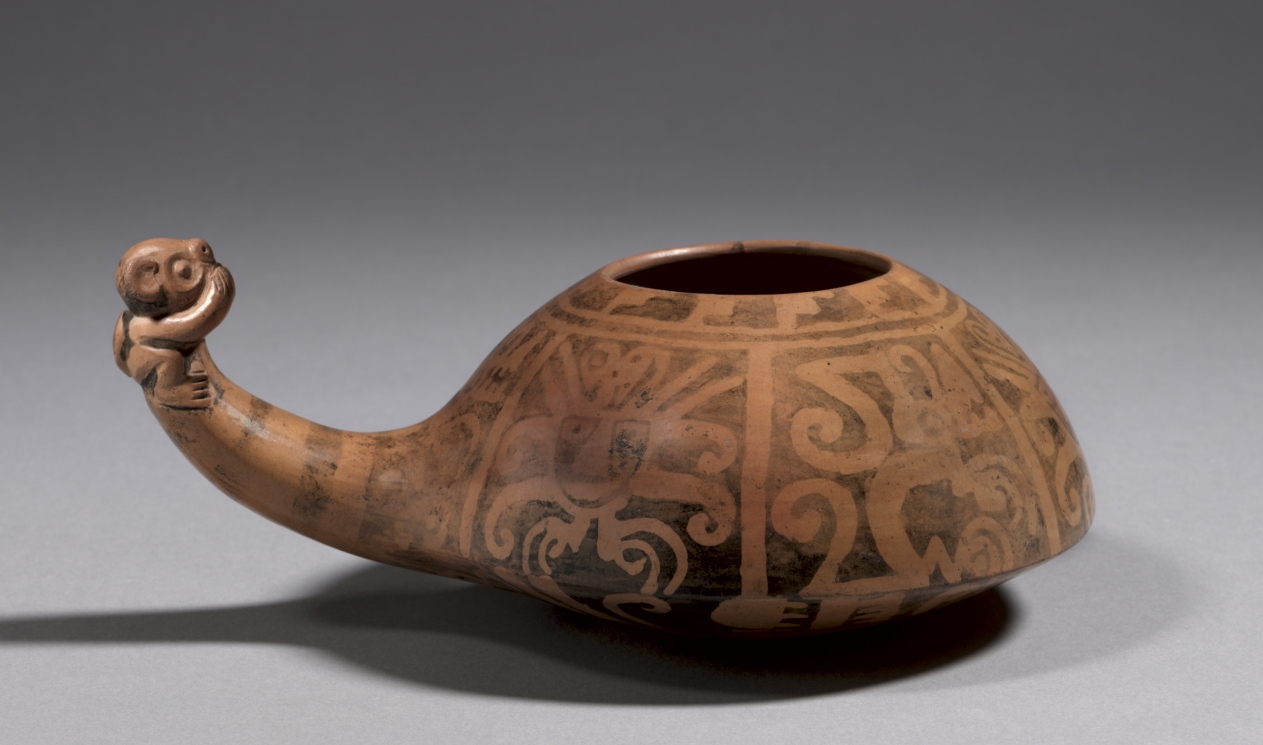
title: Dipper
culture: Peru, North Highlands, Recuay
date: 100 BCE–700 CE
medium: ceramic, slip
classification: Ceramic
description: Both of these objects feature a creature known as the "Recuay feline," although it could also refer to a fox, dog, or viscacha (a rodent). Whatever its identity, the prominent crest on its head ties it to the supernatural realm, a connection underlined by the deity head that also appears on the dipper and by the ritual function of snuff tablets, which were used to inhale hallucinogenic snuffs during religious ceremonies.